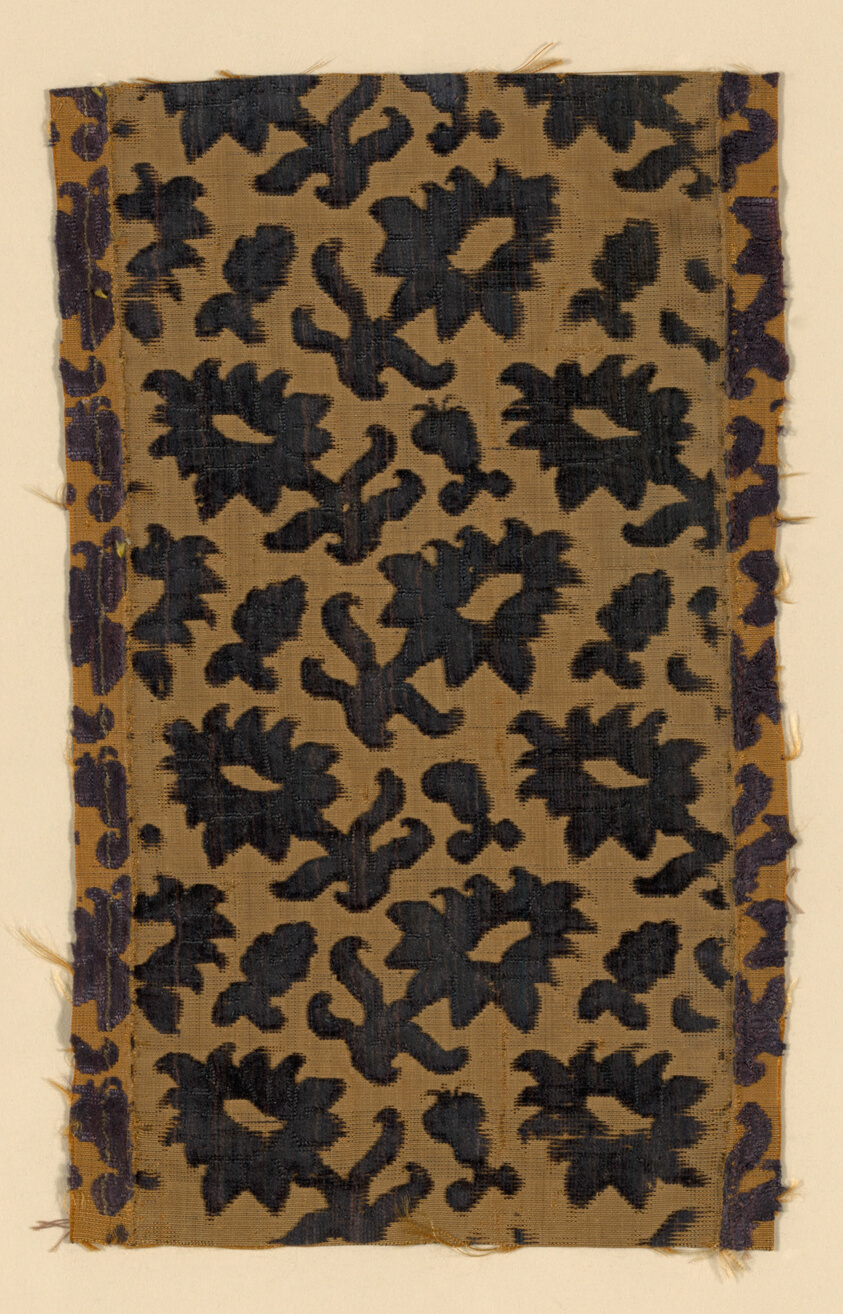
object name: Textile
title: Fragment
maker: Italy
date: 1600/50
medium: cisele voided cloth velvet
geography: Italy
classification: textile; weaving; weaving - velvet